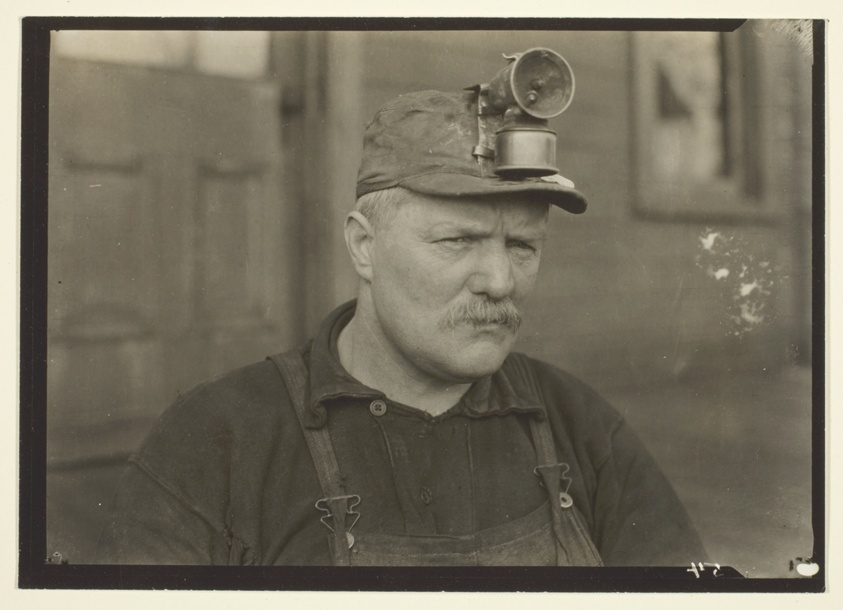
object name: Photograph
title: This Man, Scotch, Was Called The Poet Of The Mines, Eastern Pennsylvania Coal Mine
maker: Lewis Wickes Hine (American, 1874–1940)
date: 1920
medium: Gelatin silver print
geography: United States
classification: gelatin silver (developing-out-paper) pr; photographic process; photography; photograph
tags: Collected by Hugh Edwards